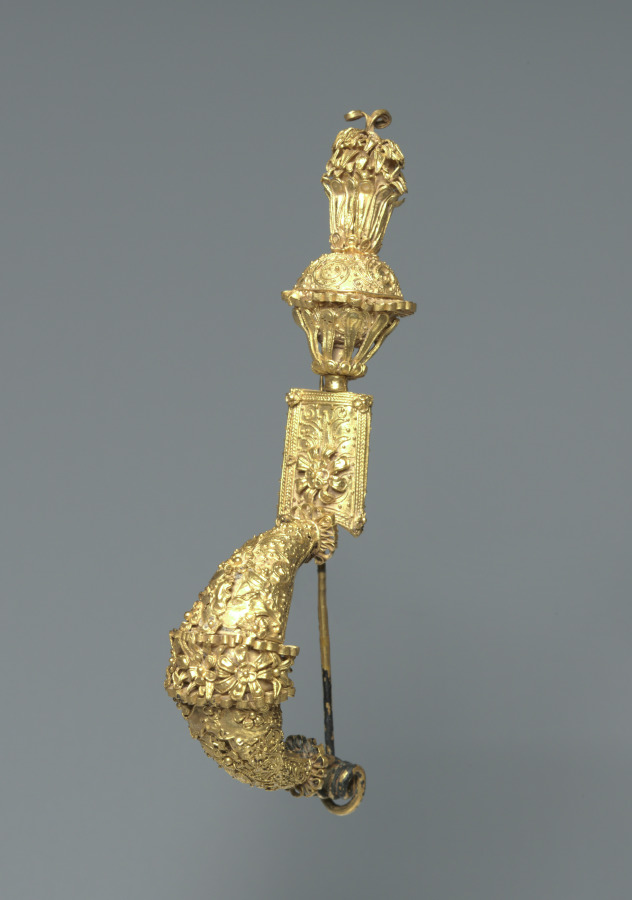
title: Fibula (Pin)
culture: South Italy, Campania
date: 400–200 BCE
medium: gold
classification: Jewelry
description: This extravagant fibula, likely used to fasten garments, is decorated with gold rosettes and vines. An enormous leech-shaped bow and pin form the body of the fibula. A band of rosettes adorns the center of the bow. Above the bow, a gold plaque is adorned with an eight-petaled flower and palmette filigree. A gold bead, perhaps representing a pomegranate, tops the plaque. The bead is crowned with oblong petals and sprouting leaves.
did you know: This fibula’s elaborate surface includes soldered gold wire and granulated spheres.